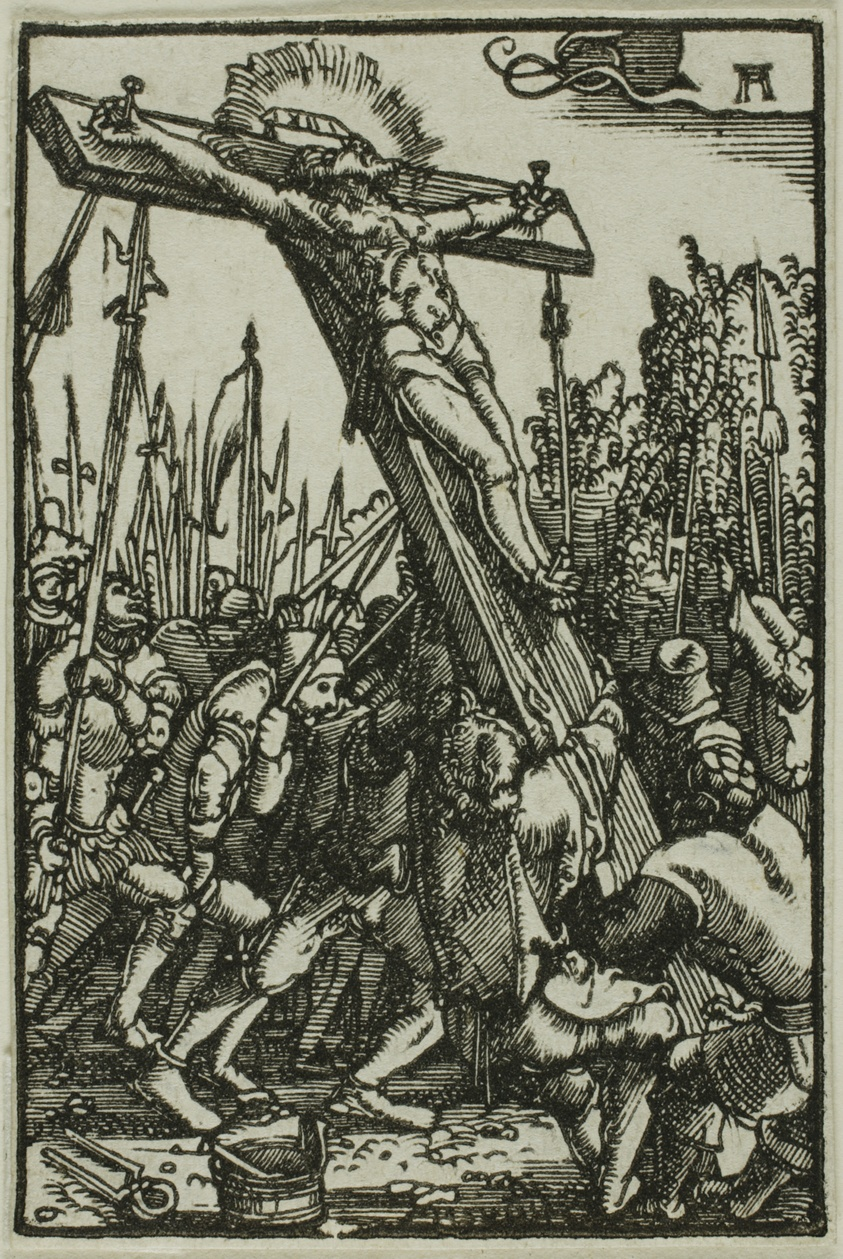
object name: Print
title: Raising of the Cross, from The Fall and Redemption of Man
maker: Albrecht Altdorfer (German, c.1480-1538)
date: 1513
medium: Woodcut in black on ivory laid paper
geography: Germany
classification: wood engraving; print; prints and drawing